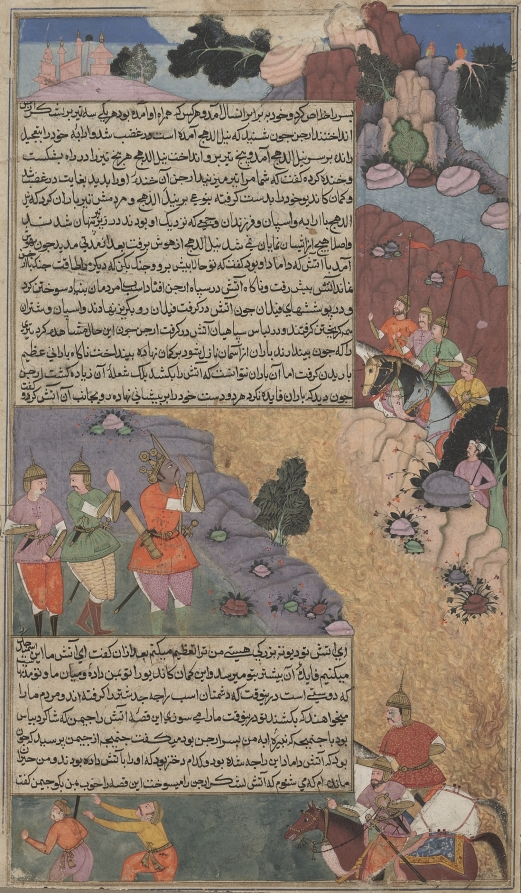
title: The First Adventure of the White Horse, Page from the Khan Khanan's Razm Nama (Book of Wars)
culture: India, Subimperial Mughal school, 17th century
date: c. 1610–17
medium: Gum tempera, ink, and gold on paper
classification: Painting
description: After the five Pandava brothers defeated their cousins, the oldest, who became king, performed an ancient Vedic ritual known as the horse sacrifice in order to determine the physical extent of his rule. For one year a horse wanders freely around the country, attended by warriors, and every land through which the horse passes becomes part of the king’s territory. The warriors go to battle with any local resistance. In this case, the warrior following the horse is Arjuna, one of the five Pandava brothers. He has encountered the son-in-law of the god of fire, Agni, who creates a river of fire to block the warriors. In a dramatic composition set on the banks of the swirling golden river of fire, running diagonally down the page between multicolored rocky outcrops, Arjuna, dark-skinned and crowned, pleads with Agni, the god of fire. He prays that the horse be allowed to pass, saying that the horse sacrifice is in accordance with sacred Vedic injunctions, and that at the end of the year, the horse will be sacrificed to him, the god of fire himself.